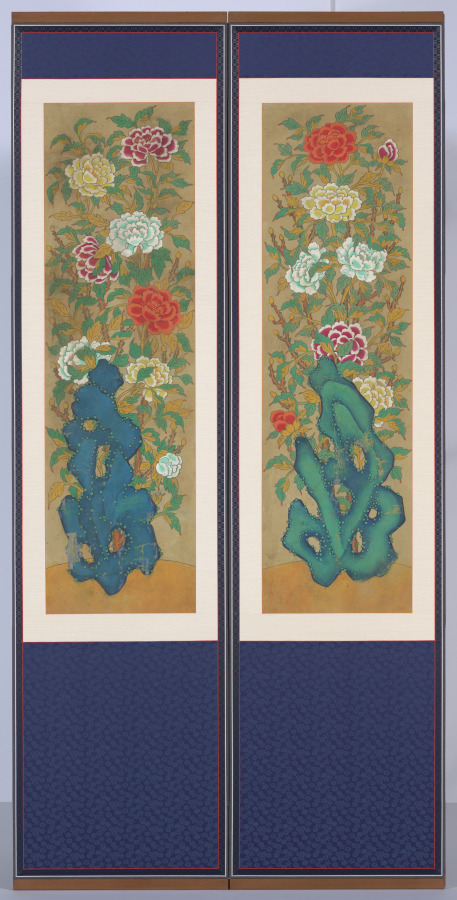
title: Peonies and Rocks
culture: Korea, Joseon dynasty (1392−1910) or Japanese colonial period (1910−1945)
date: early 1900s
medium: Six-panel folding screen; ink and color on silk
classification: Painting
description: By the late nineteenth century, peony paintings with bold designs and striking graphic stylization were increasingly produced and consumed by middle-class members because of its symbolic meaning: prosperity and wealth.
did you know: In East Asian art, peonies traditionally symbolize prosperity and wealth.